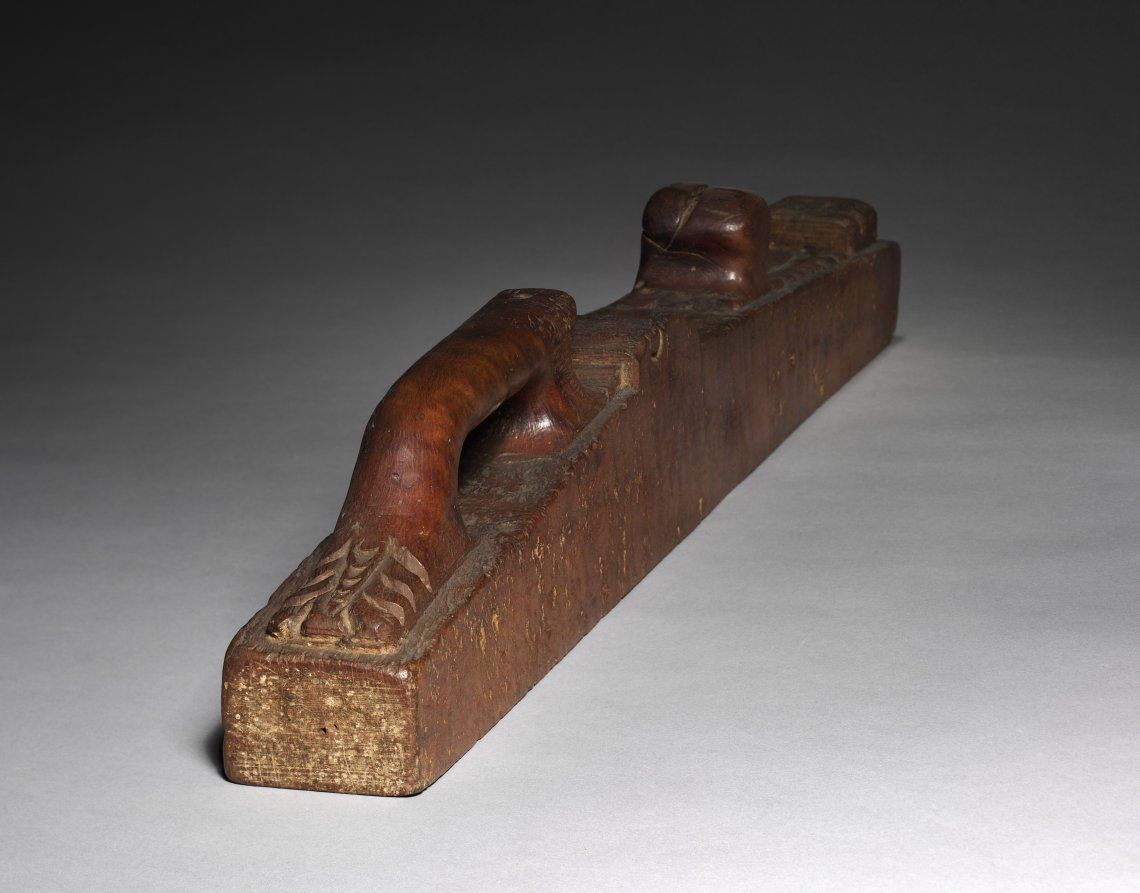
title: Plane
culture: France, 17th century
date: 1600s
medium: wood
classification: Tool